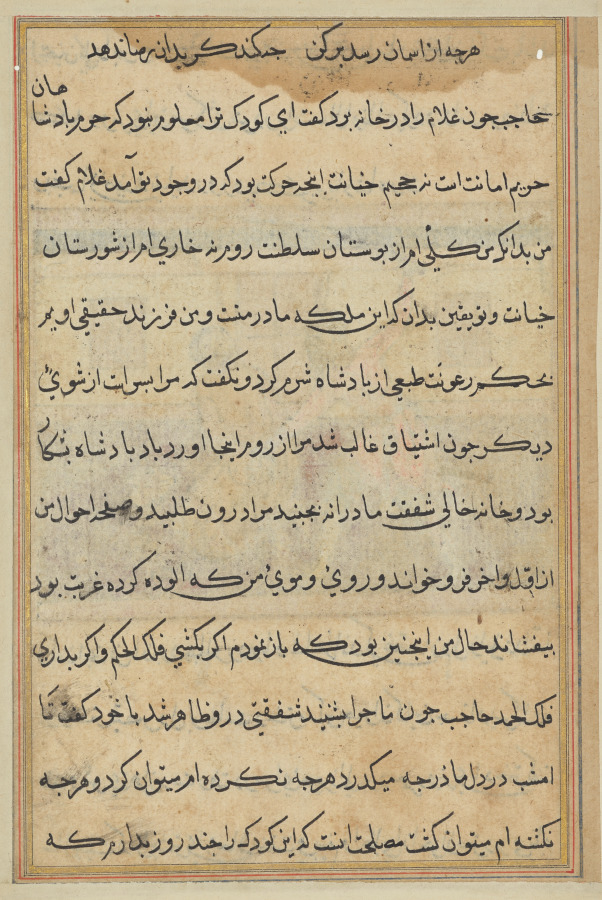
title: Page from Tales of a Parrot (Tuti-nama): text page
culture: Mughal India, court of Akbar (reigned 1556–1605)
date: c. 1560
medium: gum tempera, ink, and gold on paper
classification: Painting